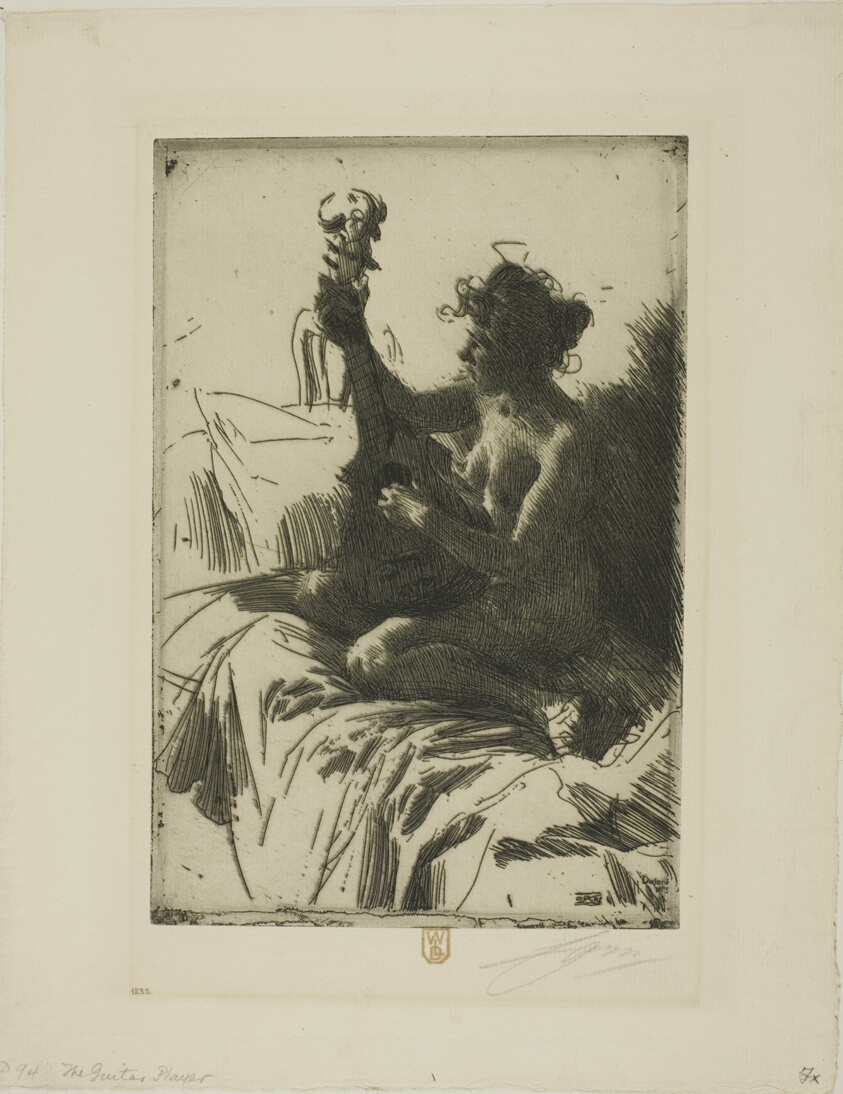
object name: Print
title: Souvenir or The Guitar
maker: Anders Zorn (Swedish, 1860-1920)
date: 1895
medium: Etching on ivory laid paper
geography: Sweden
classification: etching; print; prints and drawing